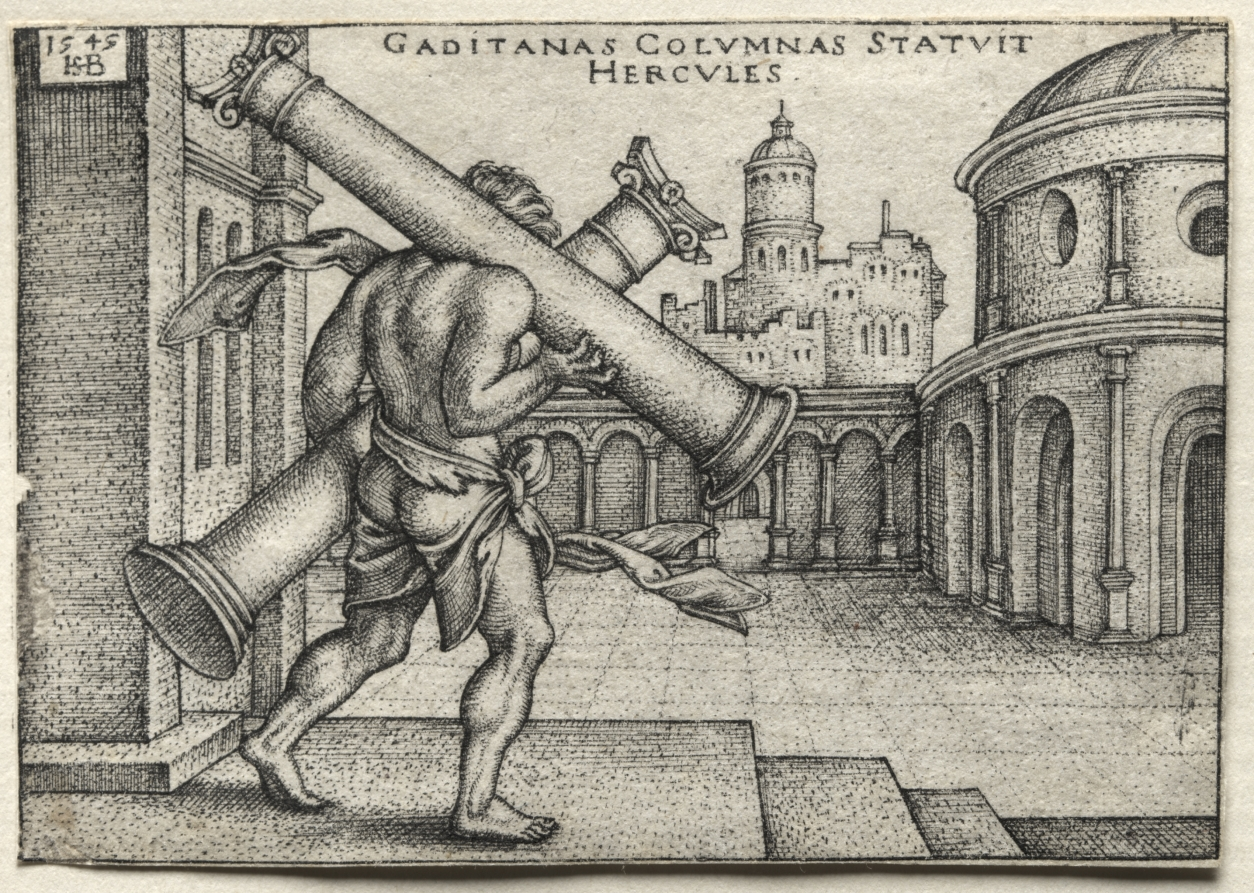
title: The Labors of Hercules: Hercules Carrying the Columns of Gades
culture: Germany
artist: Hans Sebald Beham (German, 1500–1550)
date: 1545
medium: engraving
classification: Print